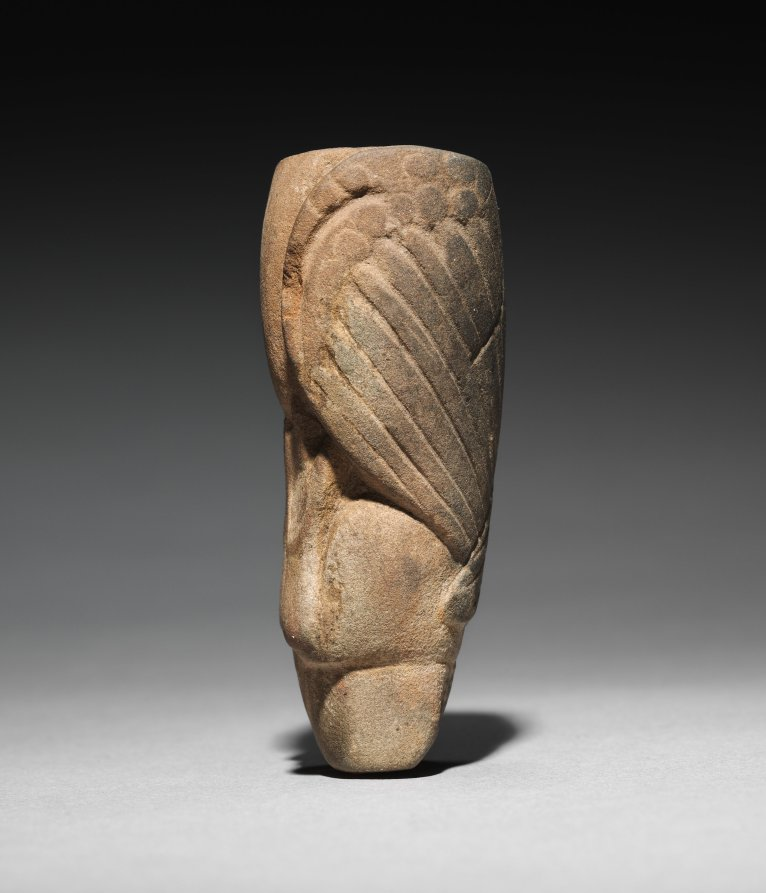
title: Bird Effigy Pipe Fragment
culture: Native North America, Adena people, Vance Mound, Newton Township, Licking County, Ohio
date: 400 BCE–100 CE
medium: sandstone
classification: Sculpture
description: The modest appearance of this small bird-effigy pipe, its head now lost, is misleading—the carving is fine and imagery, complex. The upper part takes the form of a bird’s body, the wings folded over the back. The section beneath the bird’s breast, intact but difficult to read, may depict a human torso with a pronounced navel and upraised forearms and hands, the palms facing outward. If so, one creature could be carrying or transforming into the other. The pipe was created by an artist of the ancient Adena people of southern Ohio. Smoke traveled through an interior channel to the mouthpiece, a small hole on the underside.